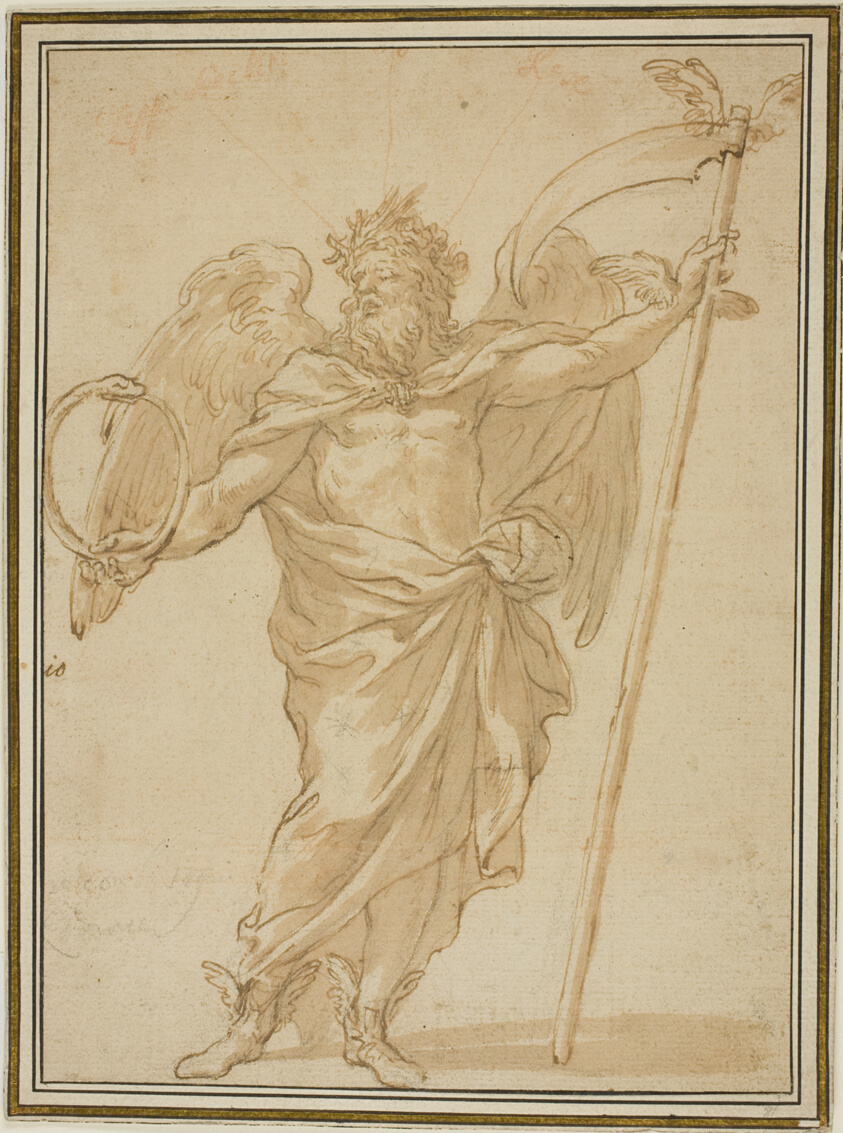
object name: Drawing and Watercolor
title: Father Time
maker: Attributed to Alessandro Algardi; Italian, 1598–1654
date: c. 1620-1650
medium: Pen and brown ink and brush and brown wash, over black chalk, with traces of red chalk, on tan laid paper, laid down on ivory laid paper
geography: Italy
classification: ink or chalk wash; drawings (visual works); prints and drawing